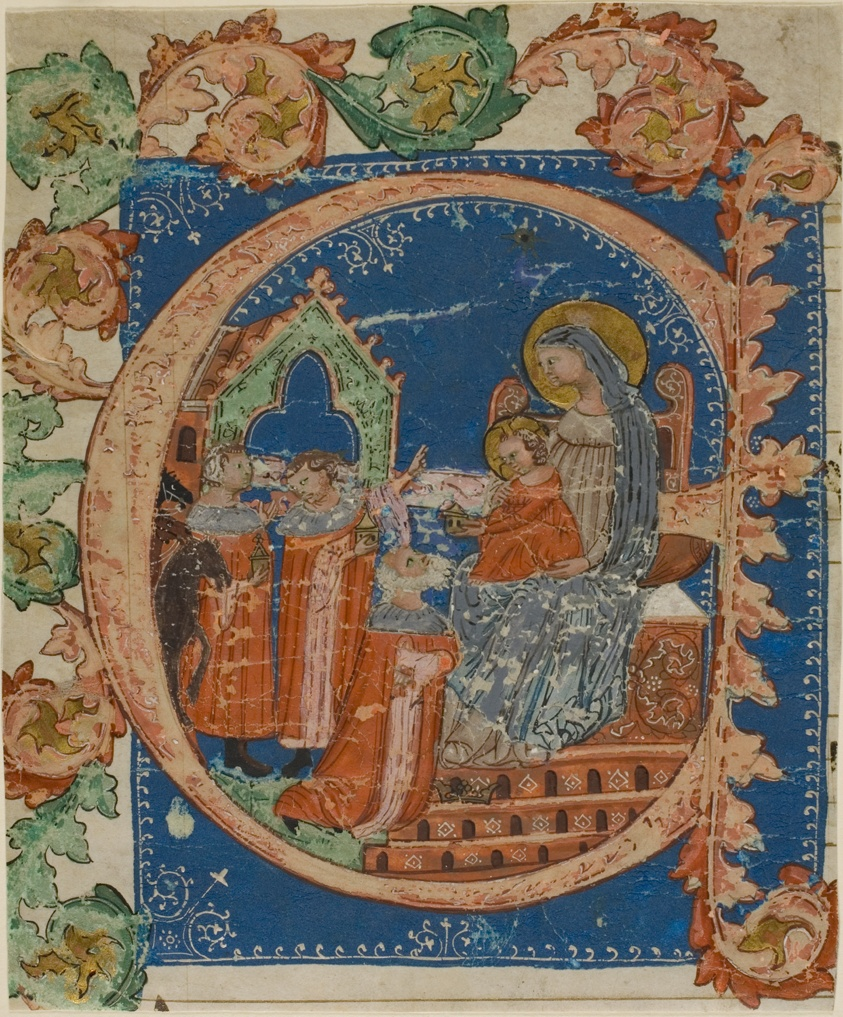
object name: Drawing and Watercolor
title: The Adoration of the Magi in a Historiated Initial "E" from a Choirbook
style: medieval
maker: Italian (Florence)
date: 1375/1425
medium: Manuscript cutting in tempera and gold leaf, with gothica textualis inscriptions in Latin in black ink, ruled in black and red ink, on parchment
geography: Italy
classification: tempera; manuscript; drawings (visual works); prints and drawing